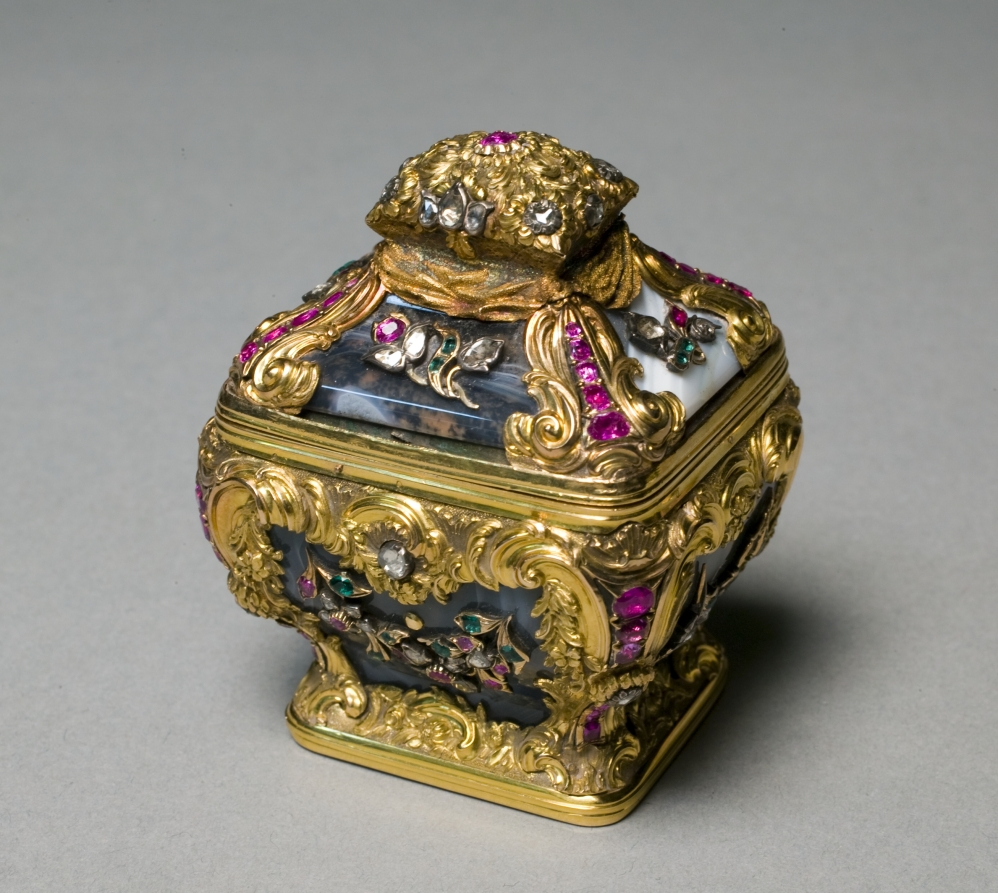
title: Snuff Box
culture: England, mid-18th century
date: c. 1750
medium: agate with gold mounts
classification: Miscellaneous